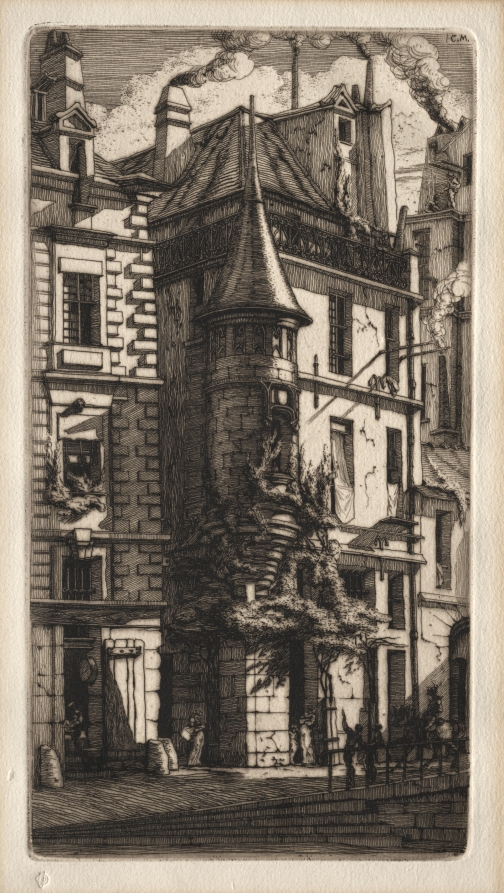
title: Etchings of Paris: House with a Turret, Weavers' Street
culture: France, 19th century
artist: Charles Meryon (French, 1821–1868)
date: 1852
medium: etching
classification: Print